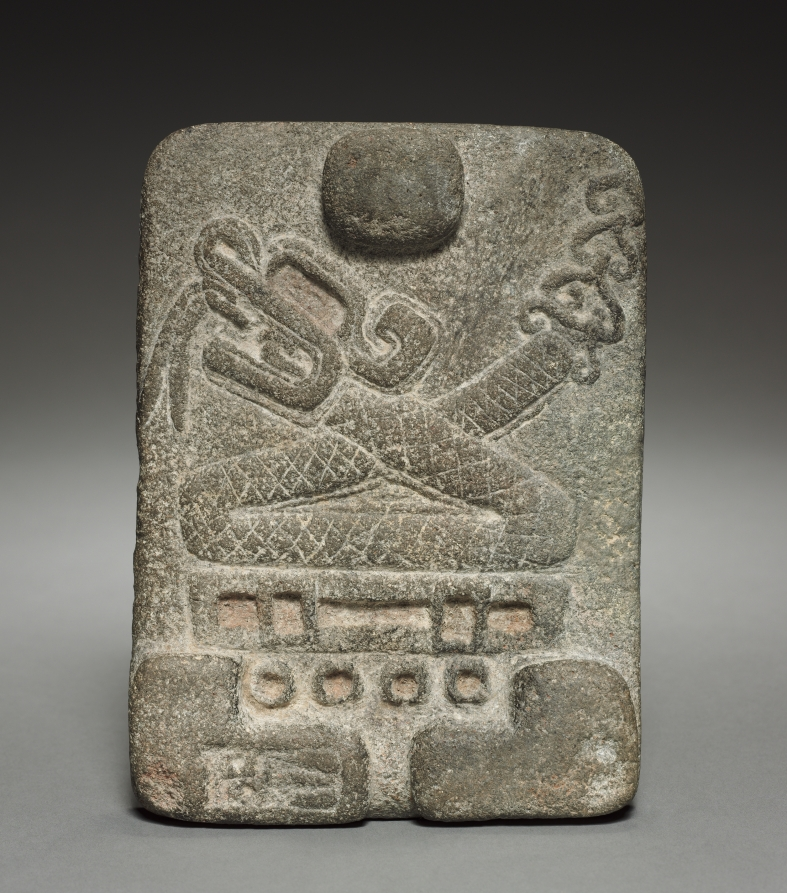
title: Miniature Metate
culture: Central Mexico, Xochicalco?, Classic Period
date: 700–1000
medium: stone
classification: Stone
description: This miniature grinding stone, decorated on the underside, was made during an era of extensive interregional contacts and artistic influences. The bar and four dots below the serpent represent the number nine, executed in the style of Xochicalco, in Morelos. The rattlesnake above resembles contemporary carvings from Veracruz, to the east. Possibly "9 Rattlesnake" was the name of an individual, or a date in the poorly understood Xochicalco calendar.